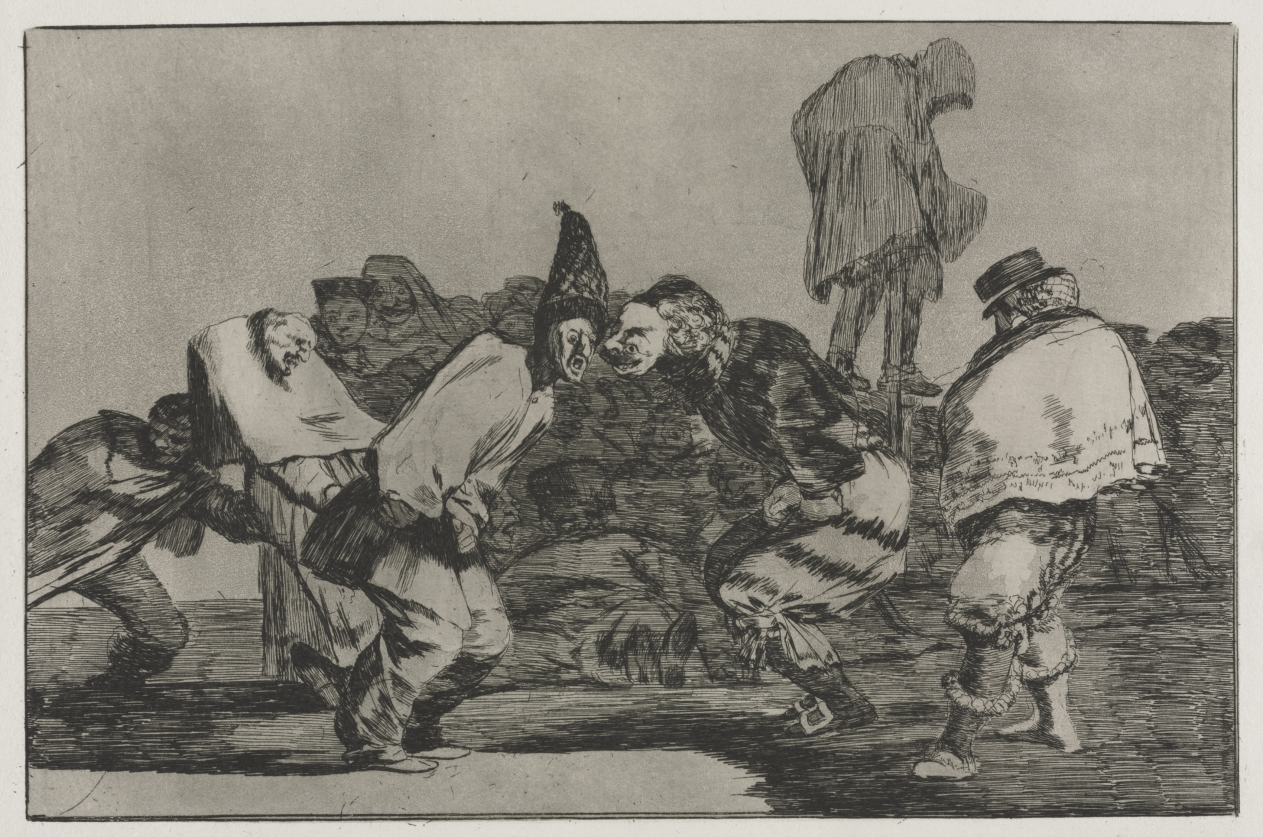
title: The Proverbs: Carnival Folly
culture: Spain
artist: Francisco de Goya (Spanish, 1746–1828)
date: 1864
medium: etching and aquatint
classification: Print